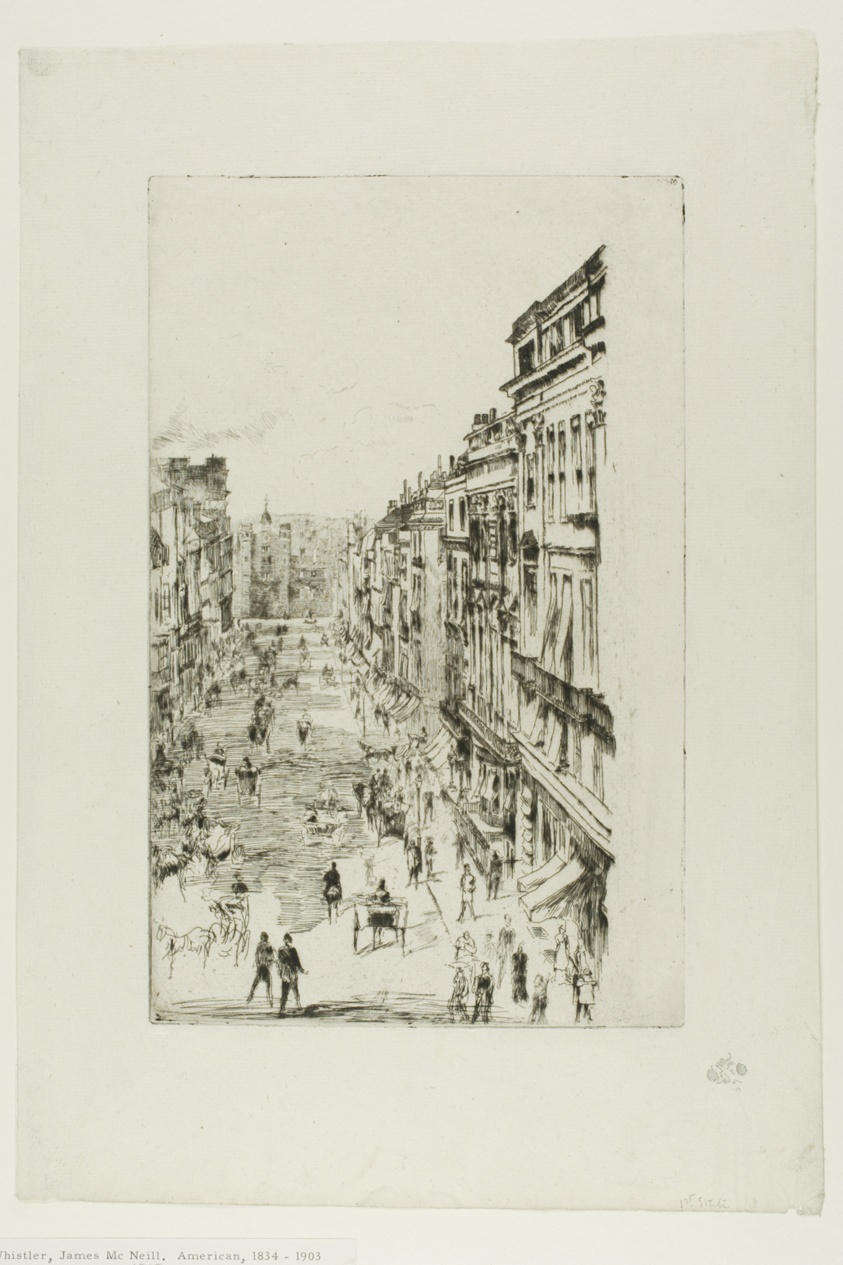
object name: Print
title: St. James's Street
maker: James McNeill Whistler (American, 1834-1903)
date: 1878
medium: Etching in black ink on off-white laid paper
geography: United States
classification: etching; print; prints and drawing; paper